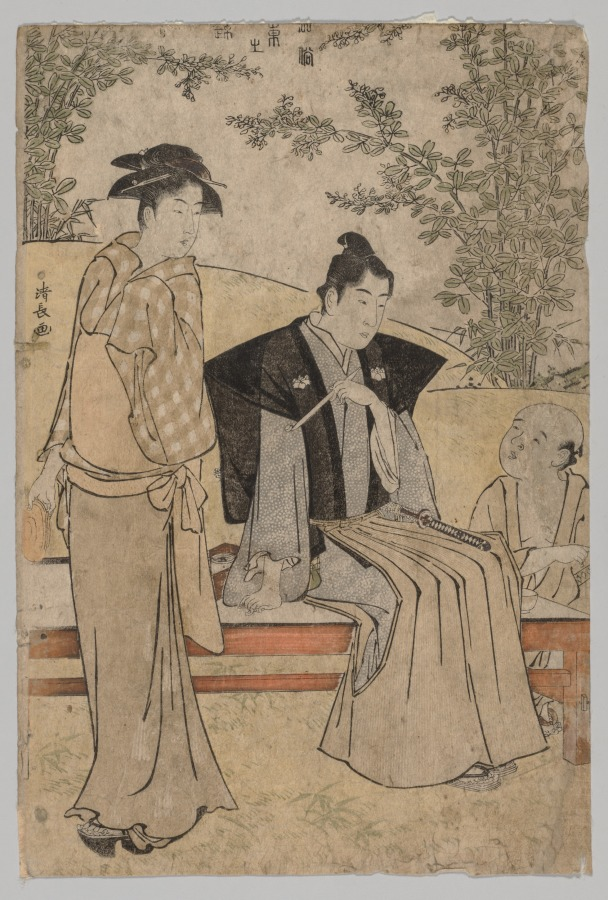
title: Two Lovers (from the series Brocades of the East in Fashion)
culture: Japan, Edo period (1615–1868)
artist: Torii Kiyonaga (Japanese, 1752–1815)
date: 1752–1815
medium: color woodblock print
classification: Print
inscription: Signature: Kiyonaga gwa